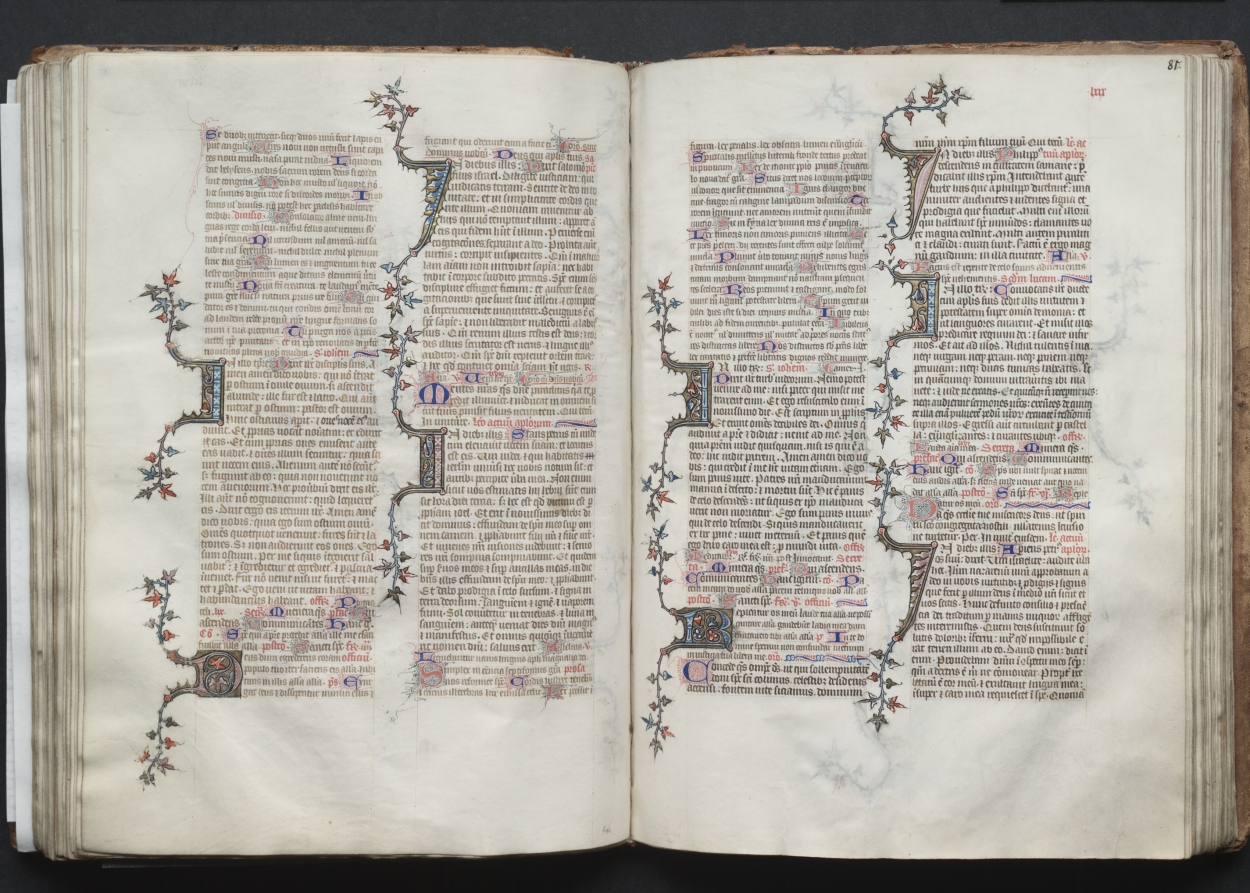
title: The Gotha Missal: Fol. 80v, Text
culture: France, Paris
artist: Master of the Boqueteaux (French)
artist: and Workshop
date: c. 1375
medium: ink, tempera, and gold on vellum; blind-tooled leather binding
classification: Bound Volume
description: The style and quality of this manuscript's decoration is typical of deluxe Parisian books made for aristocratic or royal patrons. Most of the book's decoration appears to be the work of the Master of the Boqueteaux, an artist active at the court of King Charles V (died 1380). His style was apparently shared by a number of book illuminators working in and around Paris. It is very possible that the Gotha Missal belonged to Charles V, but is not provable because the manuscript has no royal portraits and lacks a colophon. Given the book's magnificent decoration, however, it would seem that it was produced for a Valois prince, if not for the king himself. The manuscript receives its name from the German dukes of Gotha, its later owners.